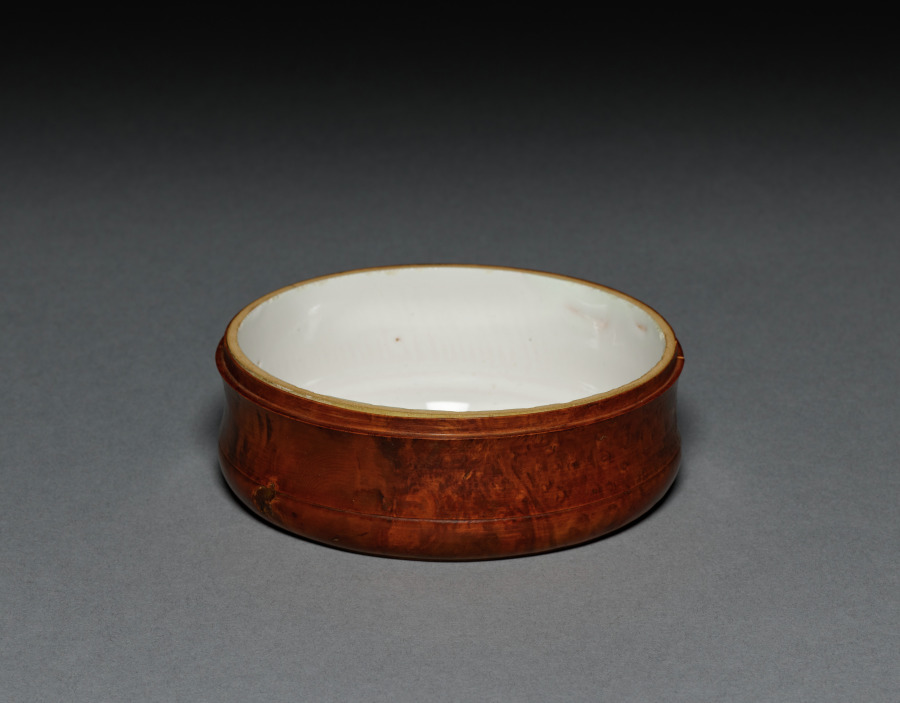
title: Box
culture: France, Moustiers, 18th century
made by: Olerys Factory (French)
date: c. 1750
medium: faience encased with burled wood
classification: Ceramic